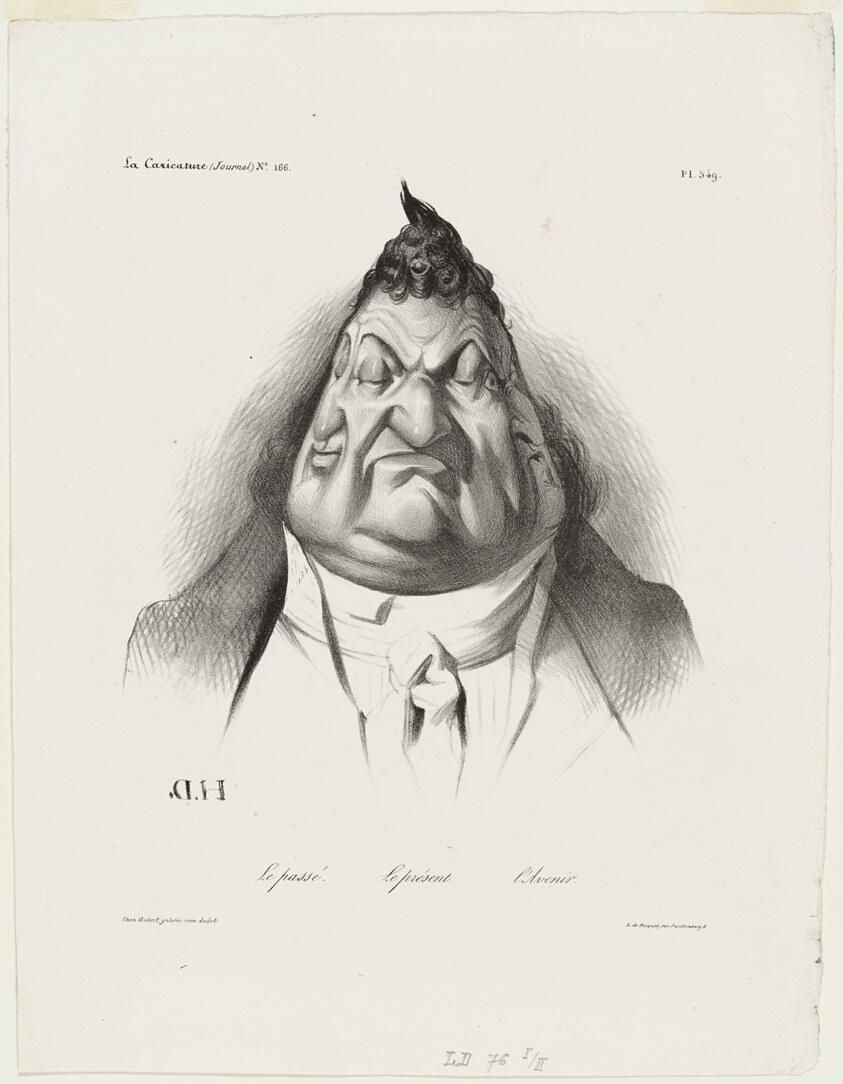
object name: Print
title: The Past, the Present, the Future, plate 349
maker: Honoré Victorin Daumier; French, 1808-1879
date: 1834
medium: Lithograph in black on off-white wove paper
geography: France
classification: lithograph; print; prints and drawing